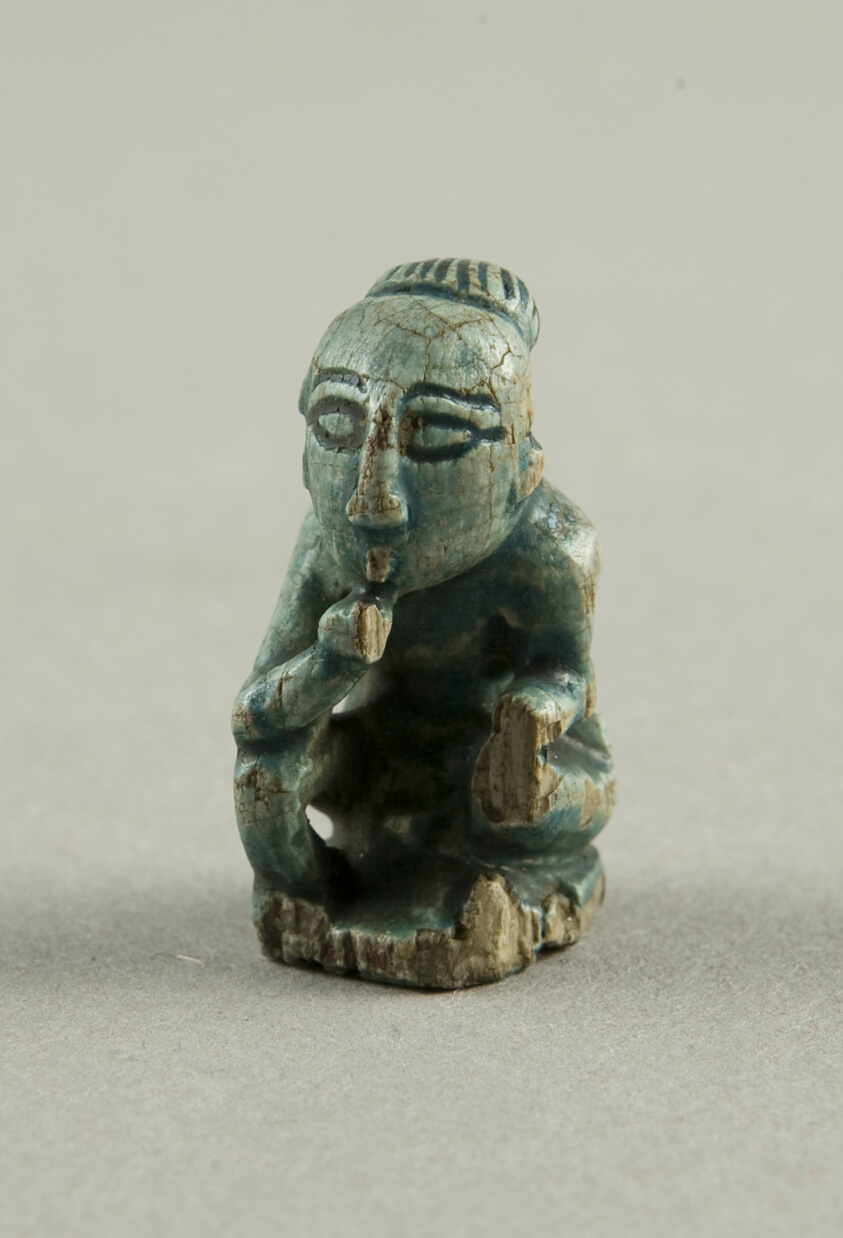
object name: Costume and Accessories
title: Amulet of the God Harpocrates (Squatting)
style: egyptian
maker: Egyptian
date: Ptolemaic Period–Roman Period (?) (332 BCE–395 CE)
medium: Glazed steatite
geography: Egypt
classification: amulet; jewelry; ancient art; costume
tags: gods (deities)